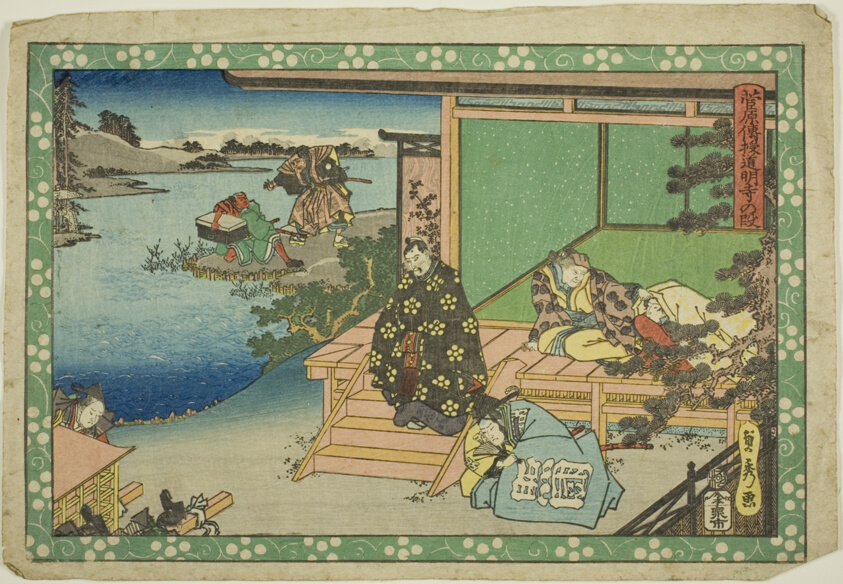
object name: Print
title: The Domyoji Scene (Domyoji no dan), from the series "Sugawara's Secrets (Sugawara denju)"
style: Japanese (culture or style)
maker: Utagawa Sadahide (Japanese, 1807-1873)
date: c. 1830/44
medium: Color woodblock print; oban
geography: Japan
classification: print; asian art